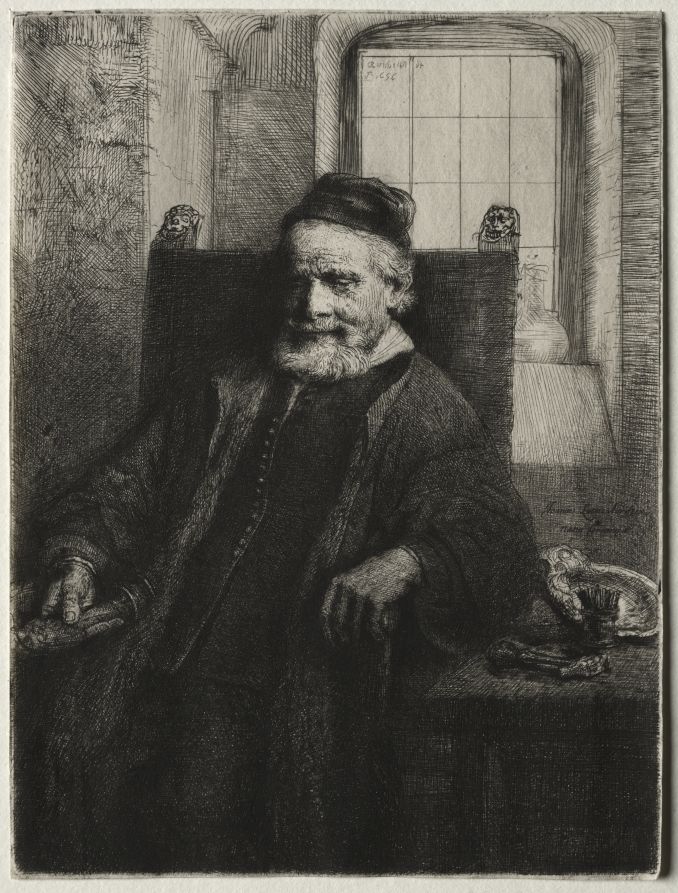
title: Jan Lutma, Goldsmith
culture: Netherlands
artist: Rembrandt van Rijn (Dutch, 1606–1669)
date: 1656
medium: etching and drypoint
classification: Print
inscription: upper center, in plate: Rembrandt / f 1656 ; center right, in plate: Joannes Lutma Aurifex / Natus Groningae ; VERSO, upper center, in graphite: a ; lower left, in graphite: MK / 15405 ; lower left, in pen and brown ink: [illegible] ; lower center, in graphite: 5242 ; lower center, in graphite: UV ; lower center, in graphite: 121 ; lower right, in graphite: B 276 / Gs 273 / Bl 18n ; lower right, in graphite: 9573[underlined] ; lower right, in graphite: [4?]